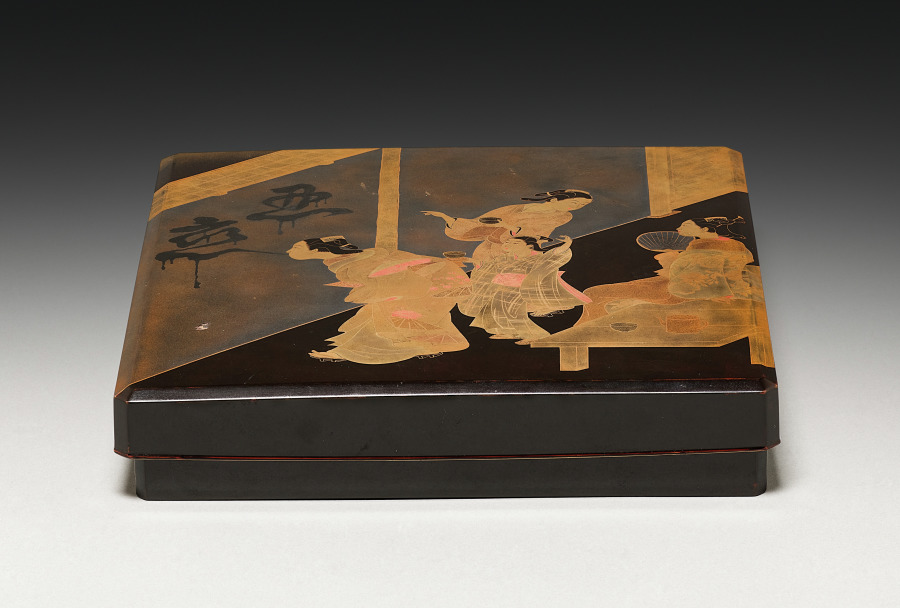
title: Writing Box with Spitting Courtesan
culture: Japan, Edo period (1615–1868)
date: early to mid-1800s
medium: Lacquered wood with maki-e (image made of sprinkled gold dust)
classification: Lacquer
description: The design on this writing box shows a courtesan who has just completed an impressive feat of spitting the term shinobukoi (忍恋), which could be translated as “hidden love” or “unrequited love,” on an earthen wall. The phrase appeared in classical Japanese poetry anthologies produced by nobles writing in ink on the finest decorated papers. Here, the confining walls of the brothel district become a space for public announcement in graffiti, with the medium being perhaps tea.